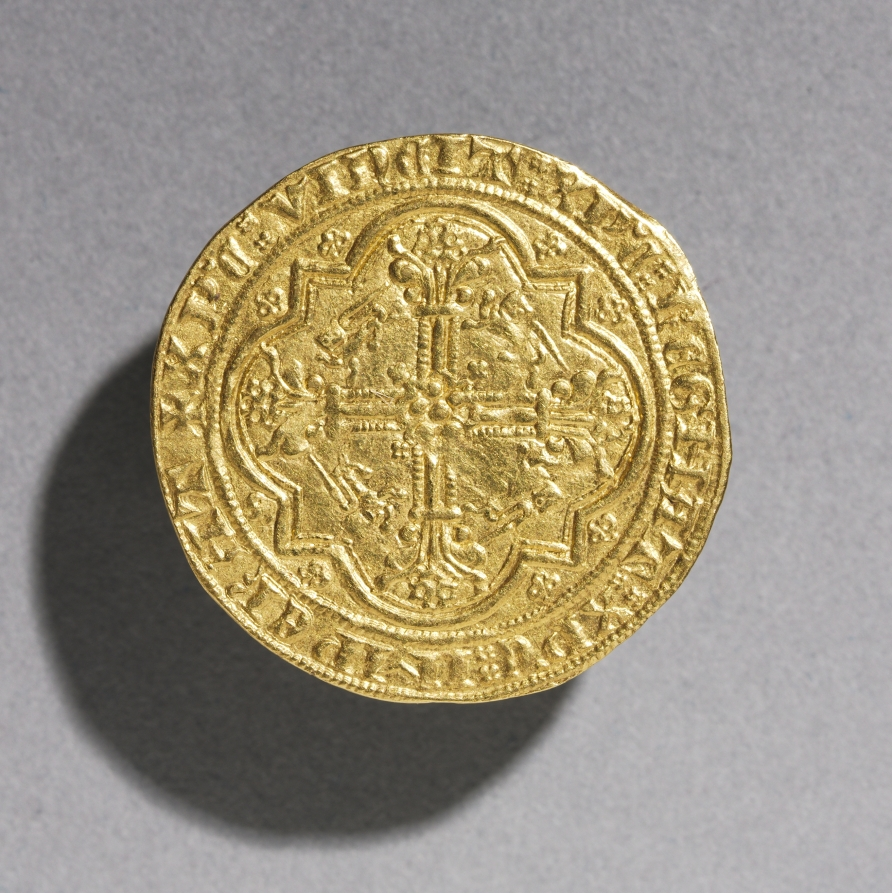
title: Leopard d'Or of Edward III of England (reverse)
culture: England, Anglo-Gallic, Gothic period, 14th century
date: 1327–1377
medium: gold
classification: Coins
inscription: floriate cross in tressure with a rose in the center and leopards in four quadrants, surrounded by the inscription: XPC:VINCIT:XPC:REGNAT:XPC:IMPERA.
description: Known as a "Golden Leopard" because of the crowned leopard on one side, this gold coin was minted for Edward III, king of England and France.